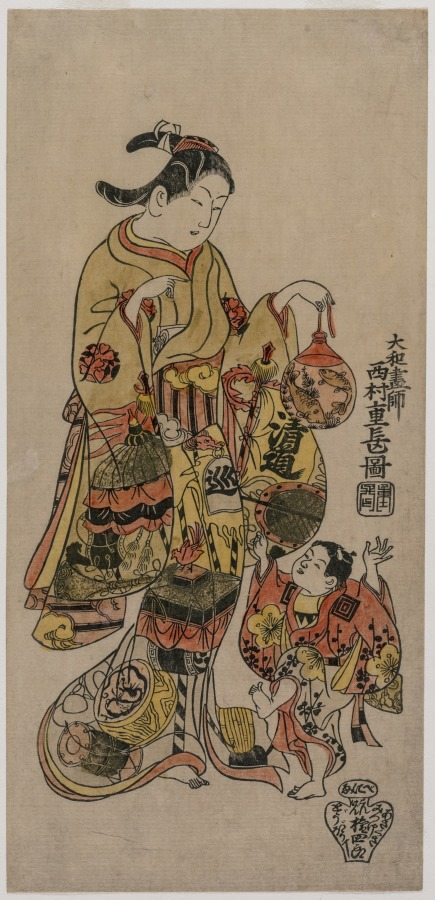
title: Child Reaching for a Fishbowl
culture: Japan, Edo period (1615–1868)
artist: Nishimura Shigenaga (Japanese, 1697?-1756)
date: c. mid 1720s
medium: hand-colored woodblock print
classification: Print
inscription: Signature: Yamato eshi Nishimura Shigenaga zu Artist Seal: Shigenaga Publisher: Izumiya Gonshiro (Benie kongen Asakusa mitsuke dobocho Gonshiro)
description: This early hand-colored print is enriched with a technique called urushi-e (literally “lacquer picture”), in which glue is painted over areas of black pigment, producing a lustrous surface reminiscent of lacquer. Metal filings sprinkled onto the designs of parasols, a fan, and musical instruments on the woman’s kimono enhance the sense of luxury.